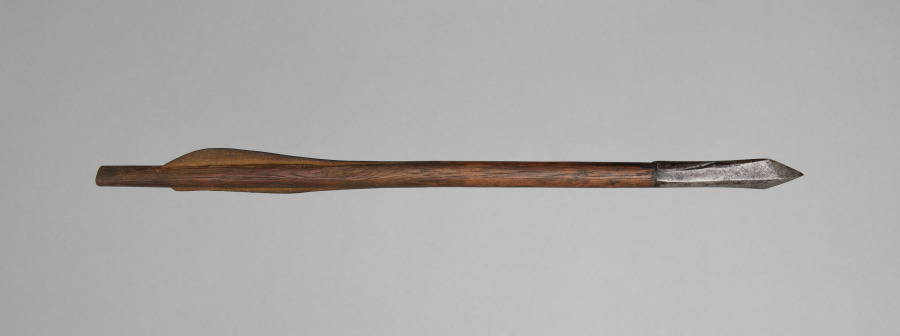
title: Crossbow Bolt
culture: Germany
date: 1500s-1600s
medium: wood, leather, steel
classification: Arms and Armor